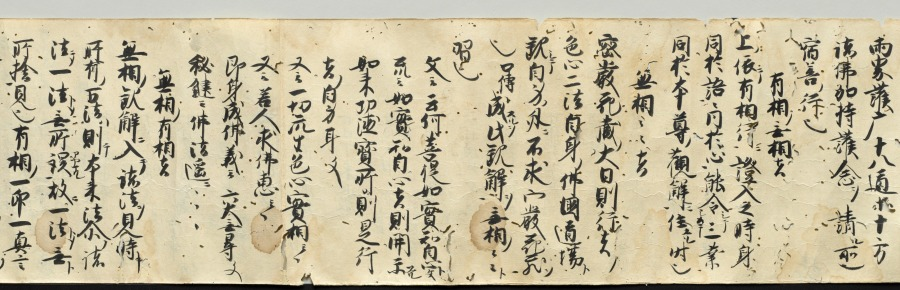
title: Scroll of Miscellaneous Notes written on a Calendar by Priest Seigen (recto)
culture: Japan, Kamakura period (1185–1333)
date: c. 1200–1231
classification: Manuscript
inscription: bears miscellaneous notes written by Priest Seigen.